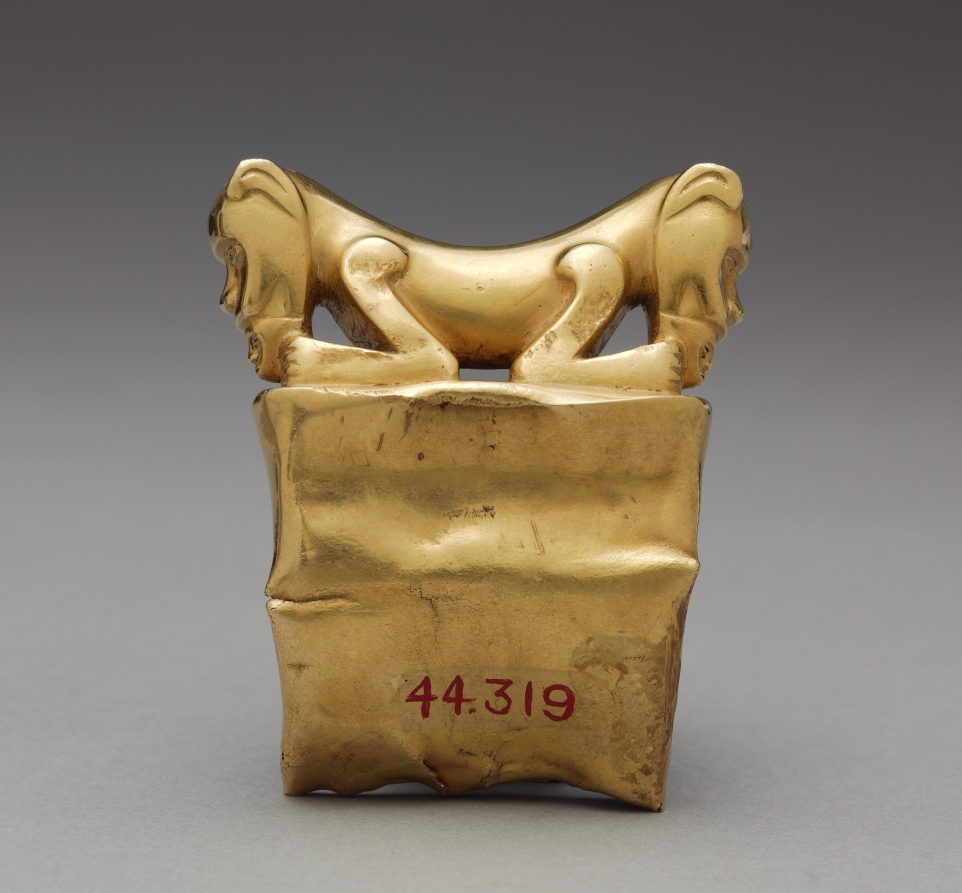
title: Staff Head(?)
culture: Colombia or Panama, International style, 5th-8th Century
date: c. 400–700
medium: cast gold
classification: Metalwork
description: The two-headed beast that crouches on the top of this object-perhaps a staff finial (head)-holds a human head or perhaps a mask between its paws. The silken surface and simple, elegant design identify the finial as of the International style, so-called because it crossed ancient boundaries and is found in Colombia as well as Costa Rica and Panama.